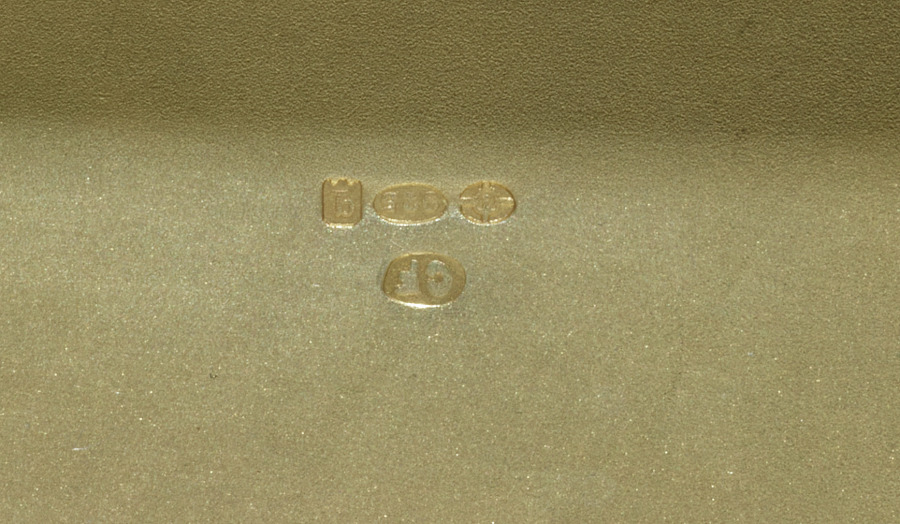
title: Cigarette Case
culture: Russian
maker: House of Fabergé (Russian, 1842–1918)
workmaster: August Hollming (Finnish, 1854–1913)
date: 1911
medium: Silver, ruby, textile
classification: Silver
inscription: Signed with initials of the workmaster August Hollming (active 1880-1913)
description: Fabergé offered variations of a cigarette case model such as this example, using different materials, surface treatments, and ornamentation. Accommodating individual clients’ wishes, the firm would also add a family insignia or additional decoration. The finely ridged surface demonstrates the superb handling of the precious metal by August Hollming, a Finnish master who worked for Fabergé in Saint Petersburg.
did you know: The cigarette case also includes a compartment for a match striker.